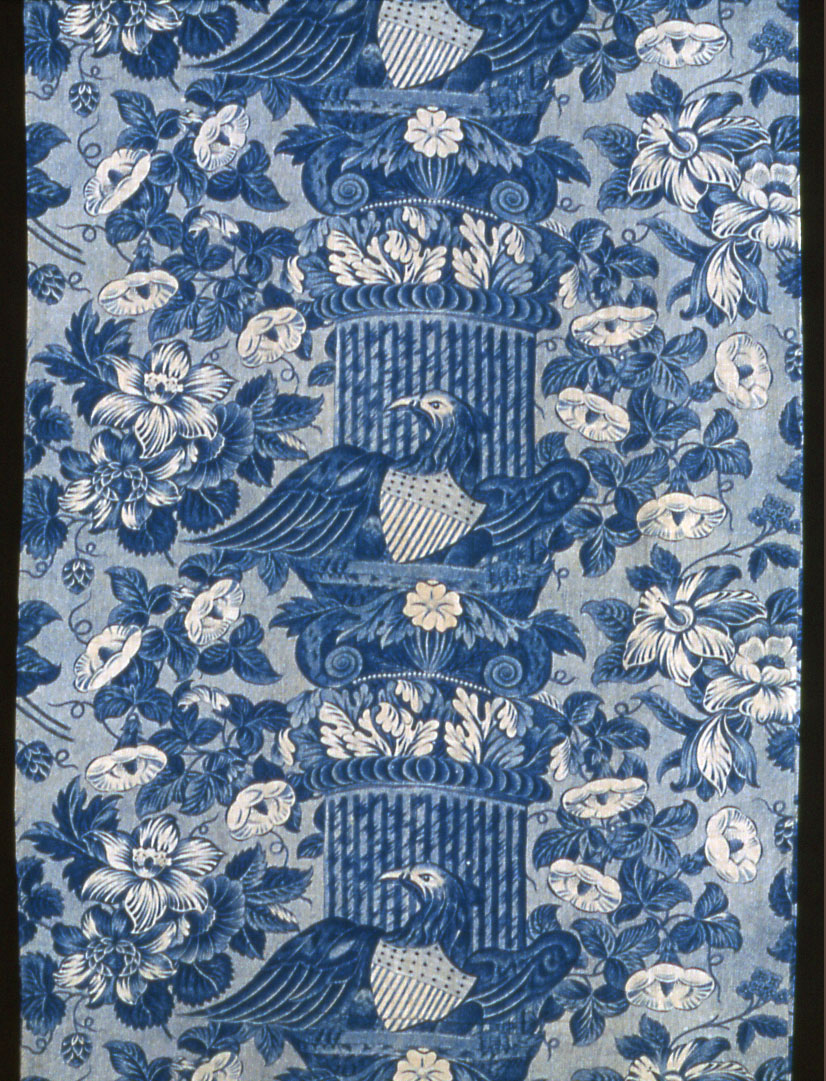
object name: Textile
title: Panel (Furnishing Fabric)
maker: Possibly United States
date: c. 1850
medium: Cotton, plain weave; roller printed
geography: United States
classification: textile; weaving - printed; weaving; furnishing textile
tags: propaganda